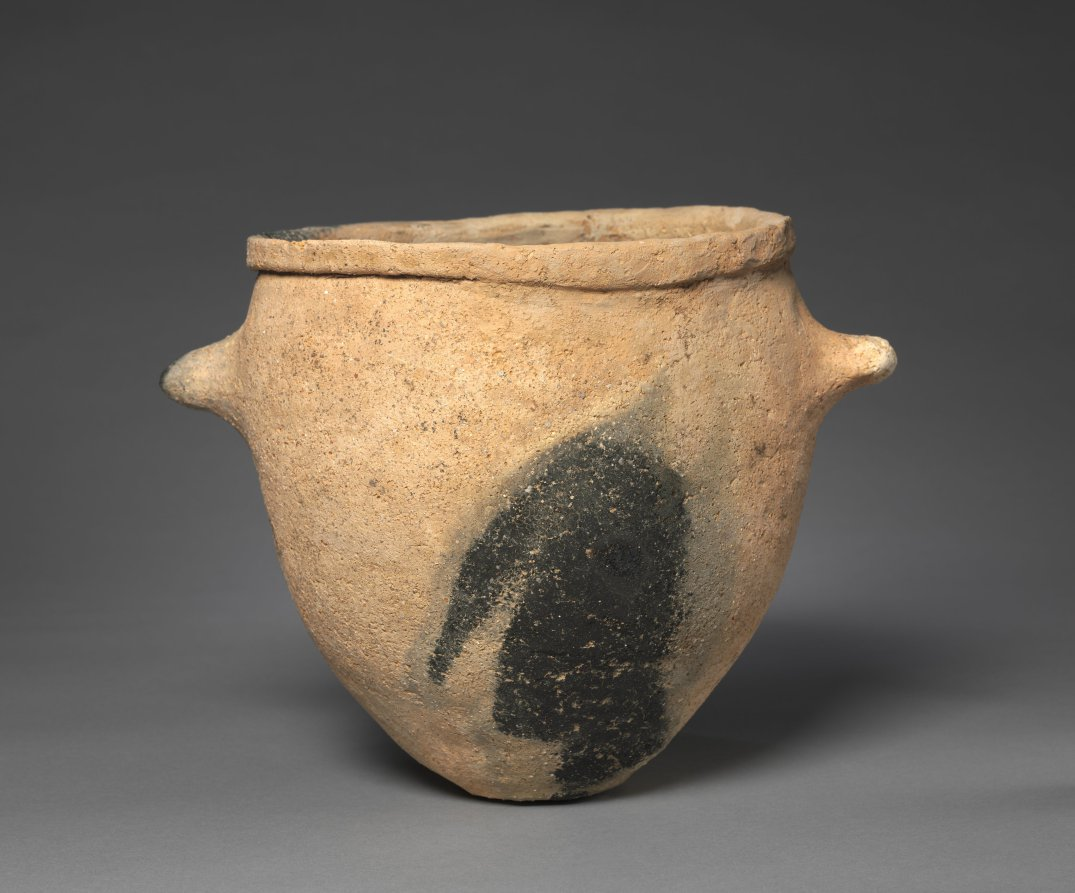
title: Vessel with Two Lugs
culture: Korea, Proto-Three Kingdoms period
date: 100s BCE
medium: earthenware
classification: Ceramic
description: The form of this early earthenware pot corresponds rather closely to the red earthenware vessel with horn-shaped handles (CMA 1997.186). The attractive, gritty fabric of the clay body, the sooty black firing marks as well as the folded and hand-crimped rim help clarify the evolution of this functional shape in early Korean ceramic history.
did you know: This earthenware with two handles may have been used for cooking.